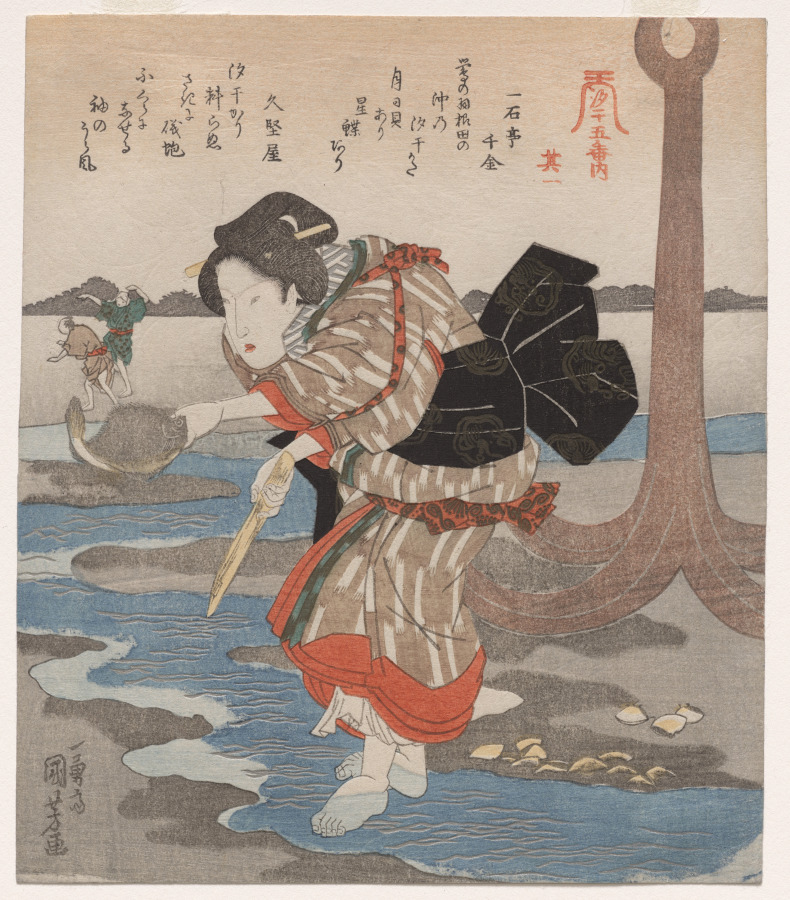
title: First Print from A Low Tide Pentaptych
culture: Japan, Edo period (1615–1868)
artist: Utagawa Kuniyoshi (Japanese, 1797–1861)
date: c. 1830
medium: color woodblock print from a pentaptych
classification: Print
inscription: Signature: Ichiyusai Kuniyoshi ga.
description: This is one of five surimono, privately commissioned prints, making up an image of people collecting sea life at low tide. Ten witty poems, written by members of a poetry circle, appear across the upper part of the composition, with two poems on each print. Based in Edo (now Tokyo), the group was led by Hisakataya Misora (active 1810s–30s), who wrote four of the poems. This composition may have been printed in April, which was considered the best time for beachcombing.